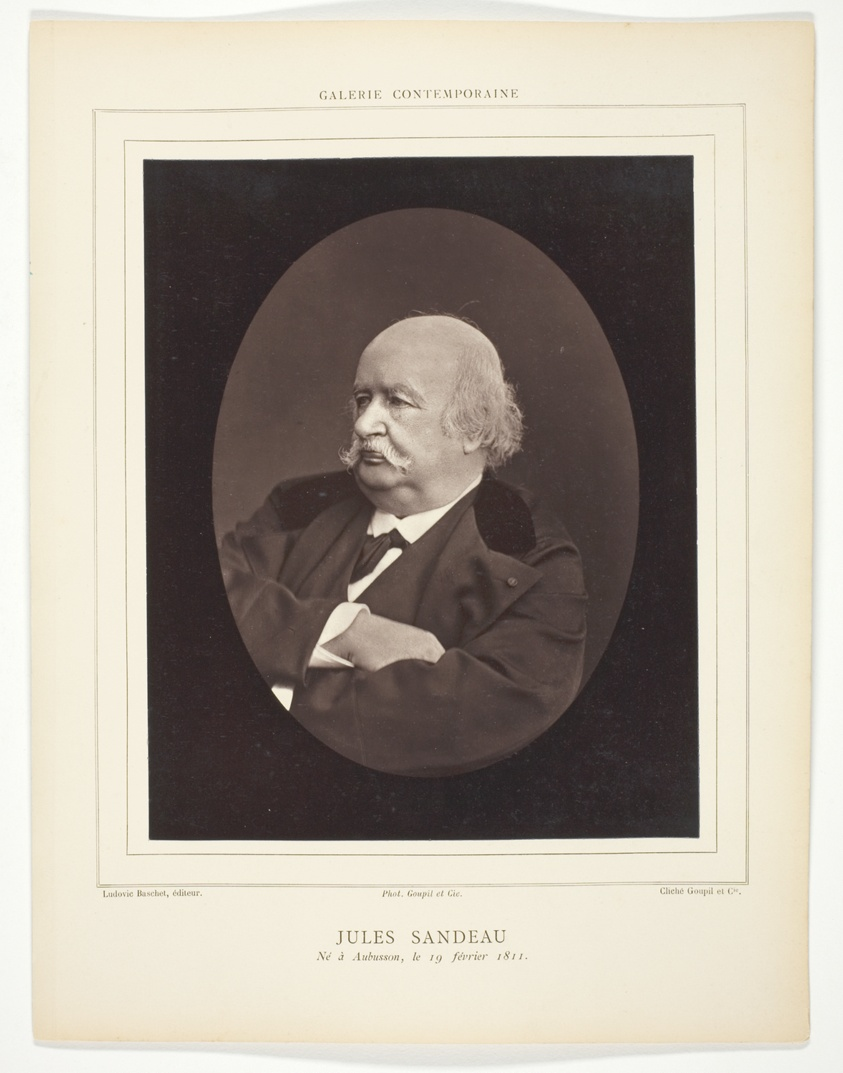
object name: Photograph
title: Jules Sandeau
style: 19th century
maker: Goupil et Cie; French, active after 1855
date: c. 1880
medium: Woodburytype, from the periodical “Galerie Contemporaine Littéraire, Artistique”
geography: France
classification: woodburytype; photomechanical process; photography; photograph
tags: Collected by Hugh Edwards, Contemporaine Littéraire